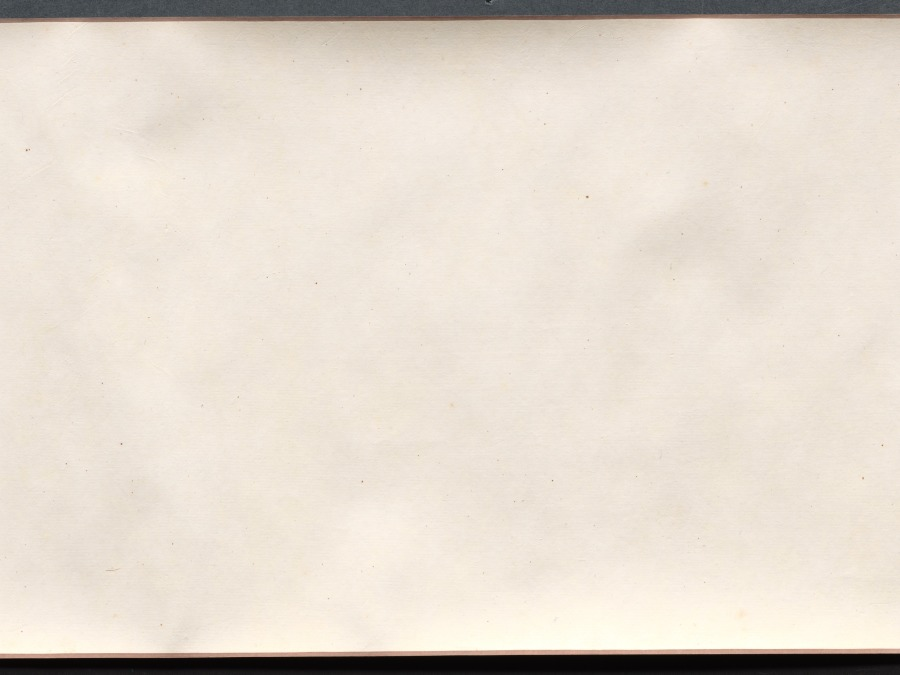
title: Four Poems: Calligraphy in Cursive Script (xingshu)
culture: China, Ming dynasty (1368–1644)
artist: Chen Jiru (Chinese, 1558–1639)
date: 1500s-1600s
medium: handscroll; ink on gold speckled paper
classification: Calligraphy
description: Written in graceful calligraphy with well-composed characters, the artist communicates his thoughts and state of mind in four poems. Characters written in dark, thick strokes convey rhythm, and indicate the moment after the writer had paused to recharge his brush with ink. Chen Jiru was a native of Huating (modern Shanghai). His calligraphy style resembles that of his friend, influential calligrapher Dong Qichang (1555–1636). Unlike Dong, Chen did not pursue government service: he burned his Confucian robes, declined a summons to serve at court, and immersed himself in literature, calligraphy, and painting.